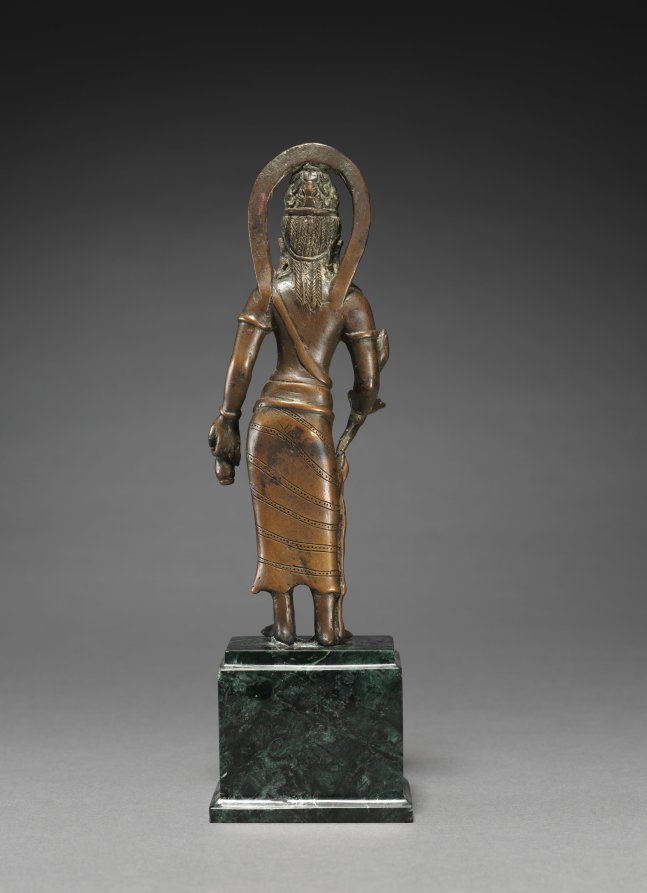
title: Padmapani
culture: Java, Pagan, Sailendra Period, 8th-9th Century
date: 700s-800s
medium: copper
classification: Sculpture